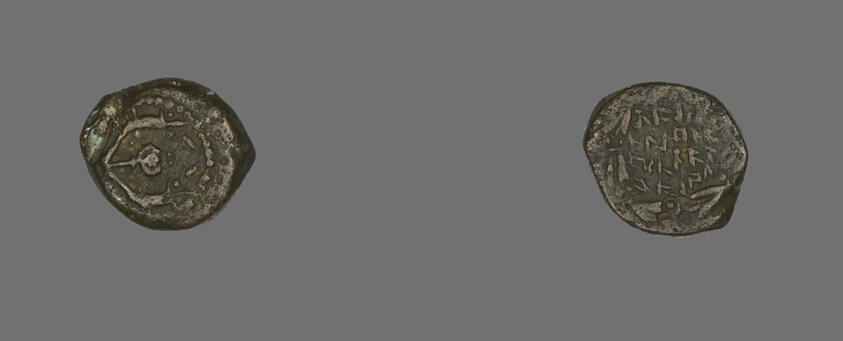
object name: Coin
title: Prutah (Coin) Depicting an Inscription within wreath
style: ancient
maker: Hasmonean Dynasty, Kingdom of Judaea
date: Hasmonean Dynasty (between 135 BCE-35 BCE)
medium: Bronze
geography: Israel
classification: coin; ancient art